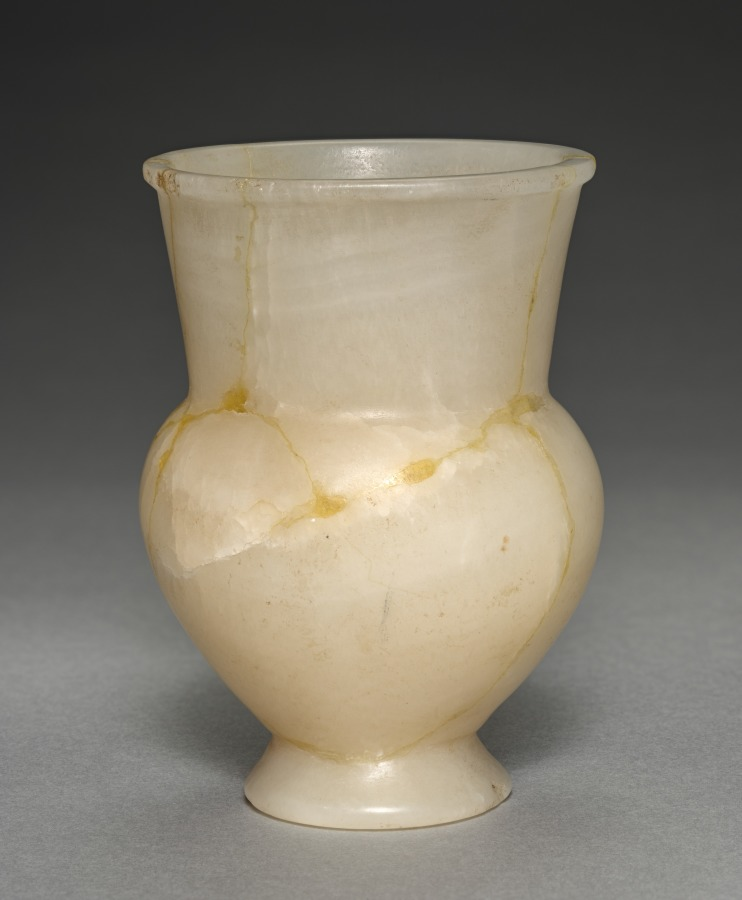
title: Long-Necked Flask (Krateriskos)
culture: Egypt, New Kingdom (1540–1069 BCE), Dynasty 18, reign of Tuthmosis III (1479–1425 BCE)–reign of Amenhotep III (1390–1352 BCE)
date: 1540–1296 BCE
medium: travertine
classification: Vessels